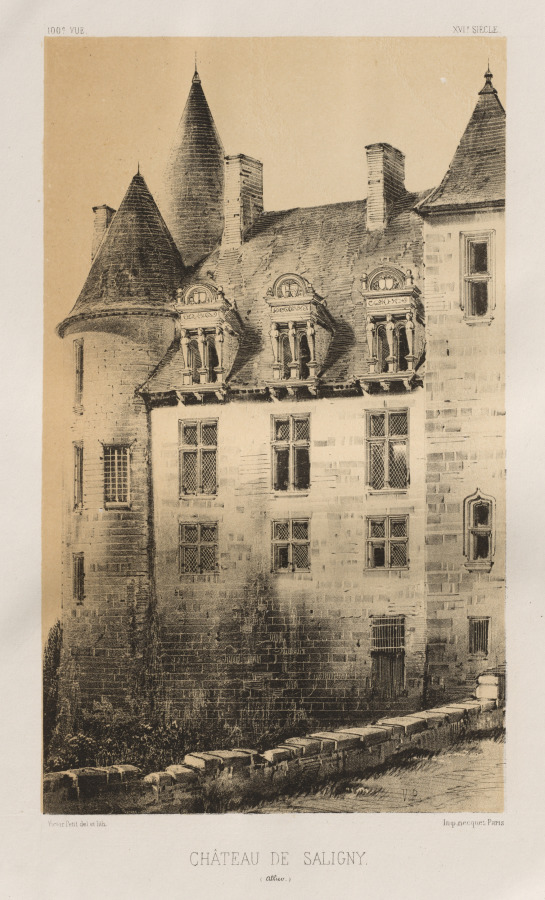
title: Architecture Pittoresque ou Monuments des XVeme. Et XVIeme. Siecles: Chateaux de France des XV et XVI Siecles: Pl.100, Château de Saligny (Alliers)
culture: France, 19th century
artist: Victor Petit (French, 1817–1874)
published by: Charles Boivin (publisher and editor); Lith de Godard a Paris (printer)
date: 1860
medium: lithograph with tint stone, from portfolio of 100 lithographs with tint stone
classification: Print